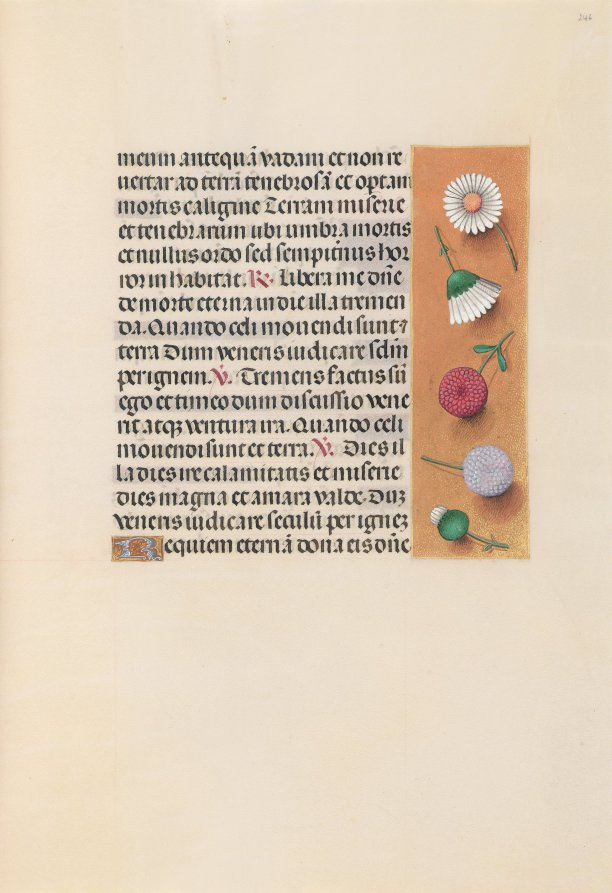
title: Hours of Queen Isabella the Catholic, Queen of Spain: Fol. 245r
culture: Flanders, Ghent and Bruges, late 15th century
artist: Master of the First Prayerbook of Maximillian (Flemish, c. 1444–1519)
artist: and Associates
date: c. 1500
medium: ink, tempera, and gold on vellum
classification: Bound Volume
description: This manuscript was illuminated by a circle of at least five highly organized manuscript painters active in the Flemish cities of Ghent and Bruges. The principal illuminator was Alexander Bening, who painted the majority of the book's miniatures. Manuscripts produced by this circle of artists are renowned for the decoration of their borders, which typically feature a rich variety of realistically-painted flowers, birds, and butterflies. This prayer book, called a book of hours, was intended not for a cleric, but for the private devotions of a lay person-in this case, Isabella the Catholic, Queen of Spain (1451-1504). Isabella's coat of arms embellishes the book's frontispiece. It is unlikely that the book was commissioned by the Queen herself; rather, she probably received it as a diplomatic gift from someone courting her patronage, perhaps Cardinal Francisco Jimenez de Cisneros. A Franciscan friar, Jimenez was dependent upon Isabella for his advancement, first to the post of Queen's confessor in 1492, and then to Archbishop of Toledo in 1495.